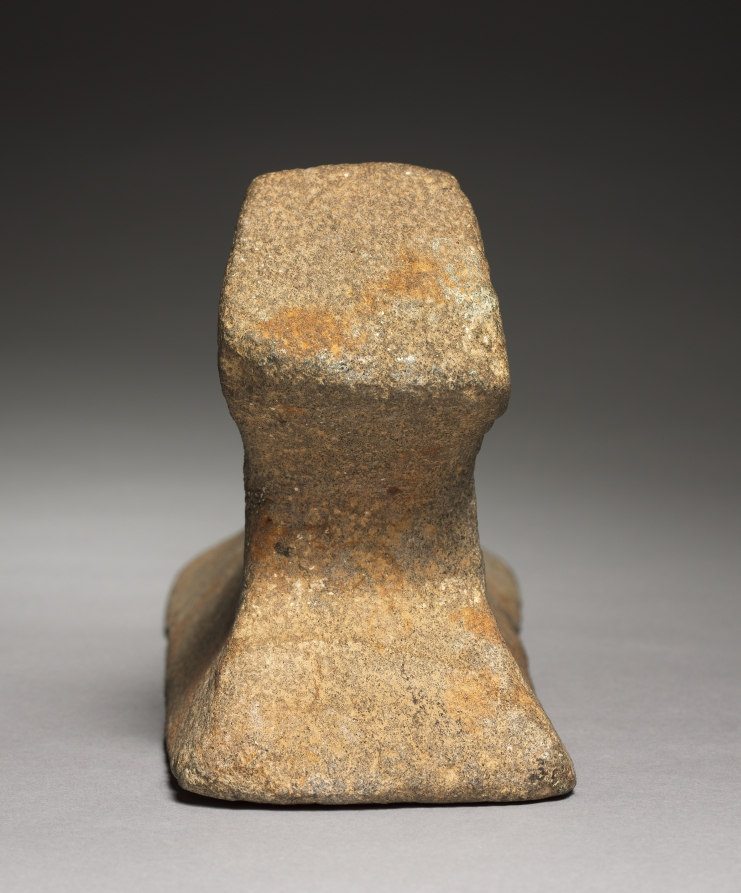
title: Animal Palma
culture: Mexico, Veracruz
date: 600–1000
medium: gray volcanic stone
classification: Sculpture